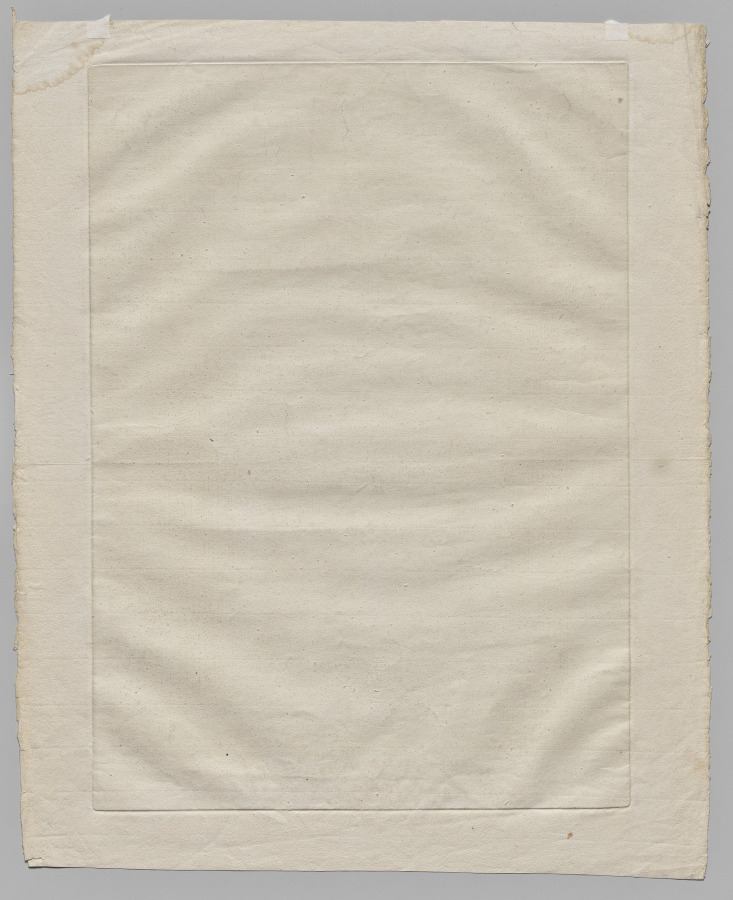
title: A View of the Vestibule of St. Peter at Rome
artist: Georges Francois Blondel (French, 1730–1800)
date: 1766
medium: mezzotint printed in black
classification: Print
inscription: Imprinted on rect: “A View of the Vestibule of St. Peter at Rome”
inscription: Imprinted on recto: “G.F. Blondel Delin & Sculp”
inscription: Imprinted on recto: “To the Rt Honble Elizabeth Countess of Northumberland This Plate is most Humbly Dedicated by her Ladyships most humble Srv’t/Published according to Act by G.F. Blondel Panton Street/GF Blondel/Plate 3”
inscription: Watermark: Grand-Jésus stock of T. Dupuy, watermark Name of Jesus (IHS), countermark T Dupuy Fin Auvergne 1742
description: After returning from several years spent in Italy, the French printmaker George-Francois Blondel settled in London in order to take advantage of the English taste for images of Italian sites. This is one of a series of eight prints he published in 1766 depicting imagined and real Italian interiors. Using the relatively new technique of mezzotint, which creates velvety, dark tonal areas, as well as low vantage points, Blondel created towering, awe-inspiring spaces. For special patrons, he printed the plates in sepia ink, rather than in black; the CMA’s set includes two of these unusual sepia impressions.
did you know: Mezzotint was relatively new at the time this print was made and had yet to be utilized for such large plates of an architectural nature as seen here.